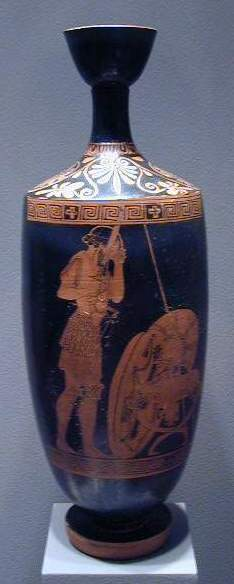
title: Red-Figure Lekythos (Oil Vessel): Warrior Cutting Hair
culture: Greek, Attic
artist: attributed to Oionokles Painter (Greek, Attic, active c. 480–460 BCE)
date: c. 480–470 BCE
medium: ceramic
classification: Ceramic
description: Whether cutting his hair or combing it, this solitary warrior seems to be contemplating his fate. If mythological, he may be Parthenopaios or another of the ill-fated Seven Against Thebes, a band of warriors tasked with overthrowing that central Greek city. The Seven left mementos for their loved ones before departing, and he may be cutting a lock of hair for this reason. The same motive might apply to historical soldiers as well, and he may represent one of the many Greeks who battled the Persians around the time this vase was made. Unfortunately, the inscriptions painted on either side of the figure seem to be nonsense—actual Greek letters that do not spell out recognizable names or words.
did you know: The painter lavished great detail on this warrior’s armor, even including a lion on his helmet’s cheekpiece!